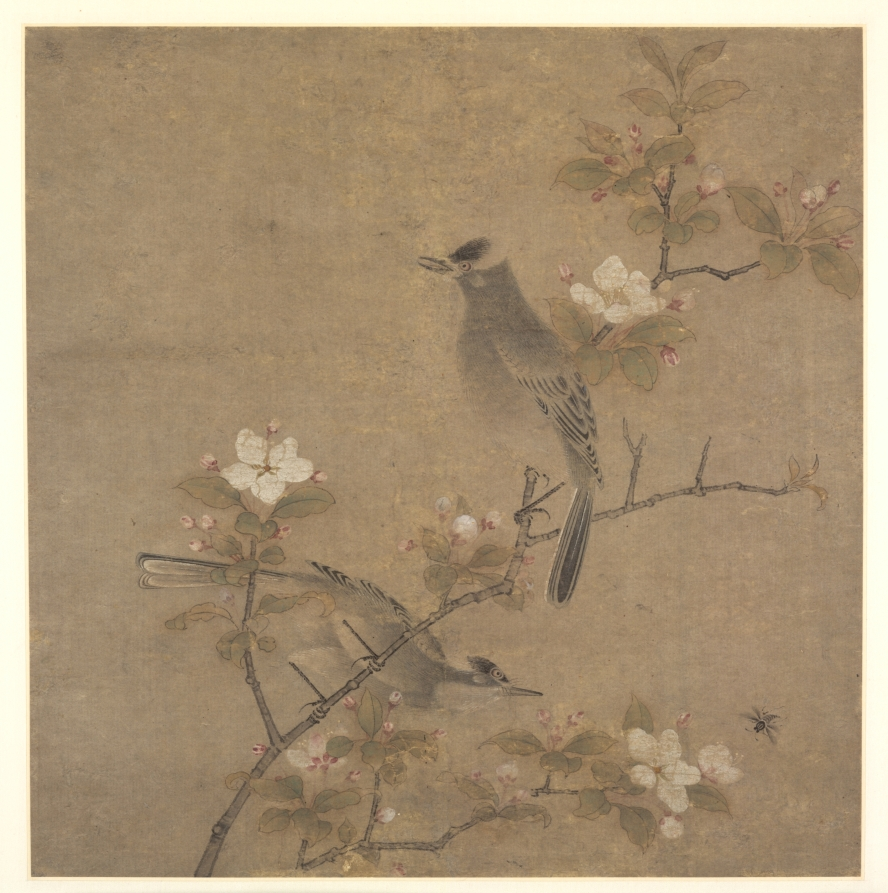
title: Flowers and Birds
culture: China, Yuan dynasty (1271-1368)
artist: style of Qian Xuan (Chinese, 1235–1307)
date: first half of the 14th Century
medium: Album leaf; ink and color on paper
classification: Painting